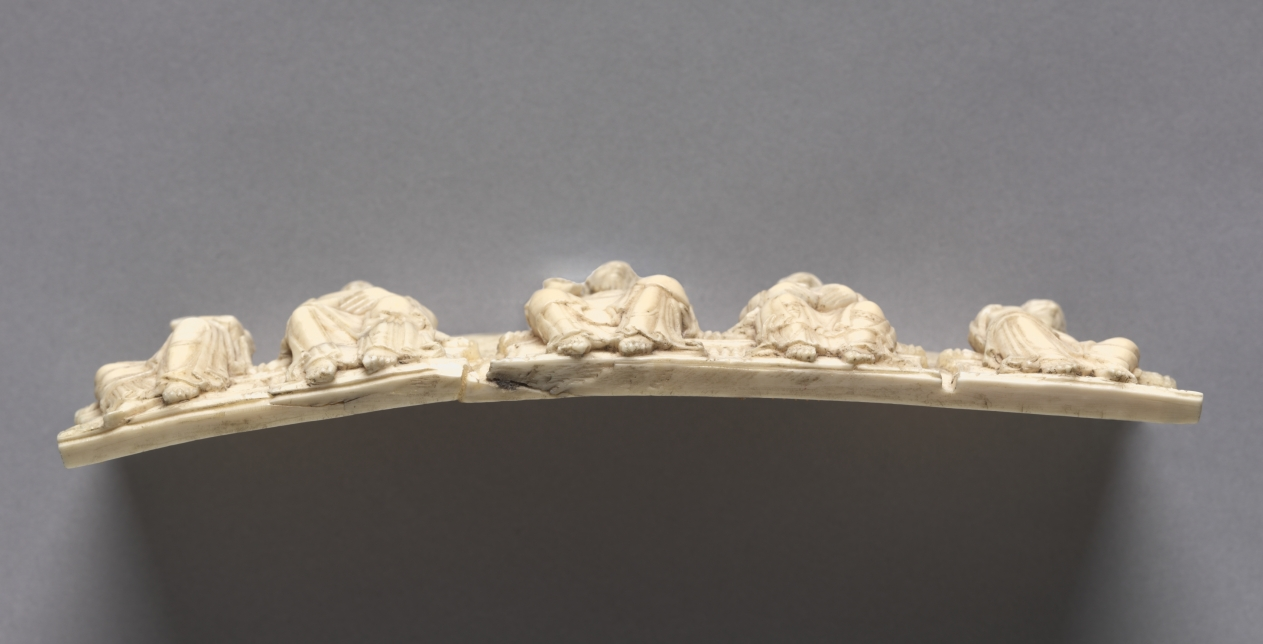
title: Plaque from a Portable Altar: Christ and the Apostles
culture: Germany, Lower Rhine Valley, Romanesque period, 11th century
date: 1050–1100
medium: walrus ivory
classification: Ivory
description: This intricately carved ivory panel once decorated the side of a portable altar. One of three it depicts Christ in Majesty and his apostles, and was the first major acquisition of William M. Milliken, the museum's first curator of decorative arts and later director (1930–1958). As Milliken later recalled, the pieces "were immensely intriguing, monumental in scale, even if tiny in size, the Christ in the mandorla could have been enlarged and would have graced the tympanum of a great cathedral."